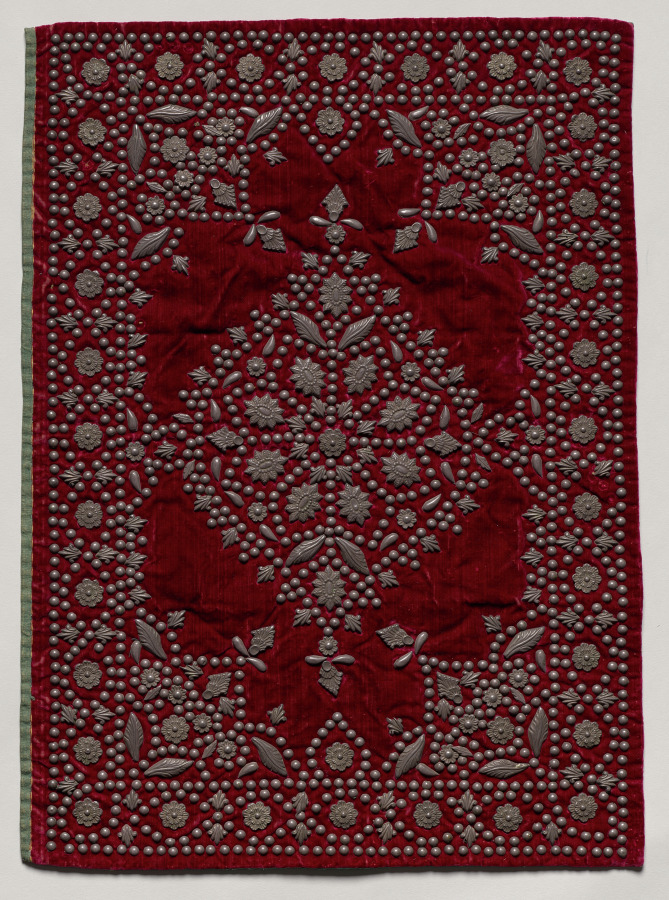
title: Embroidered Velvet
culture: India, 18th century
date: 1700s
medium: embroidery; velvet decorated with silver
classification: Embroidery